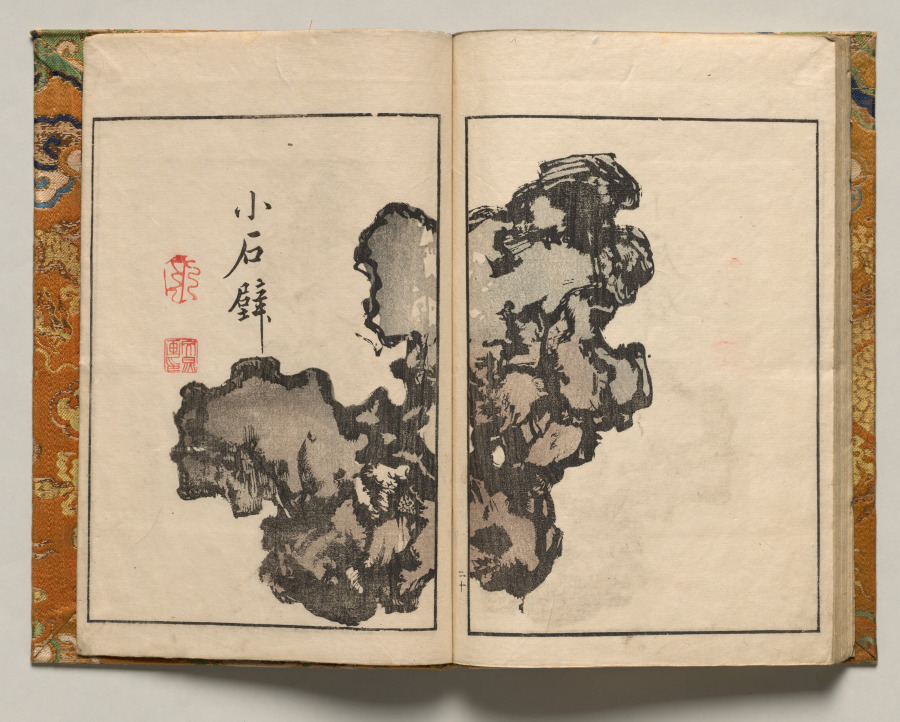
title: Small Rock Sculpture, Design Twenty from Shazanrō Picture Book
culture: Japan, Edo period (1615–1868)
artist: Tani Bunchō (Japanese, 1763–1841)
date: 1816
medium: Woodblock-printed book; ink and color on paper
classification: Bound Volume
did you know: Shazanrō was one of Tani Bunchō's style names.